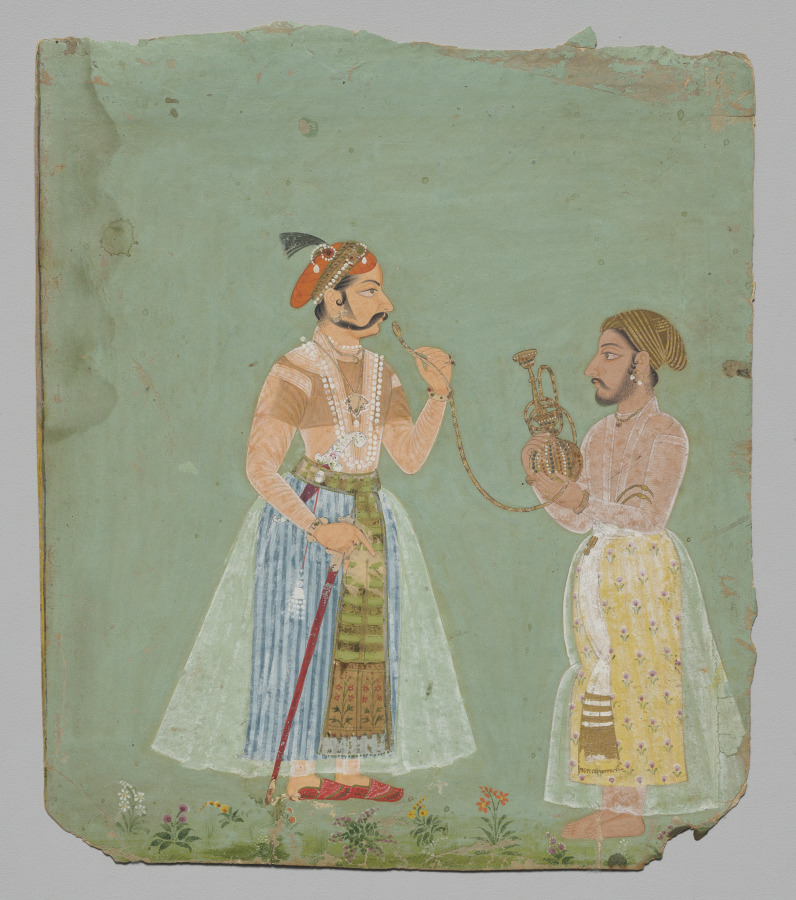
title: Rana Amar Singh II (reigned 1698–1710) smoking a hookah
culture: Northwestern India, Rajasthan, Rajput Kingdom of Mewar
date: c. 1700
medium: Gum tempera and gold on paper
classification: Painting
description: The ruler of the Hindu kingdom in southern Rajasthan is depicted in the manner of a Mughal portrait. His muslin tunic is belted with a sash that has flowering plants embroidered on the border, which was popularized at the court of the Mughal emperor Shah Jahan. Other Mughal characteristics include the color of the background and the flowering plants along the lower border. Sandalwood paste explains the dark areas around his chest and arms.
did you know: The green pigment called verdigris has caused acid deterioration of the paper.